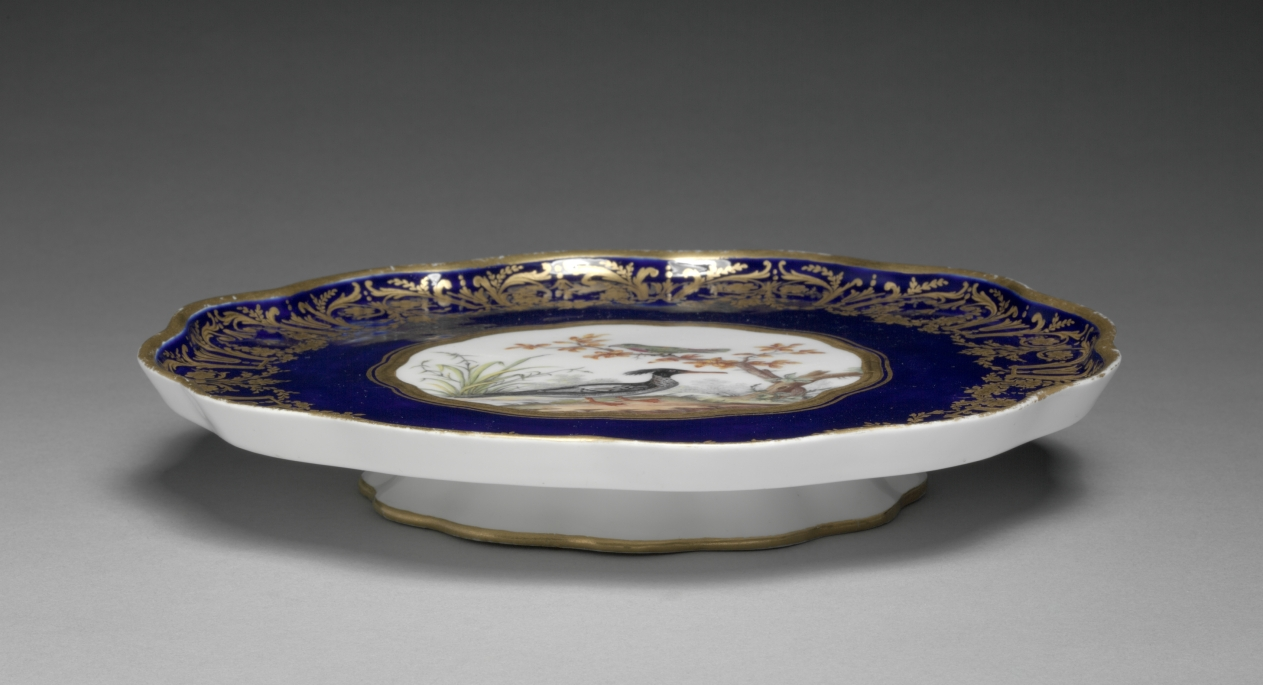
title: Footed Dish (soucoupe à pied)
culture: France, Sèvres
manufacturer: Sèvres Porcelain Factory (French, est. 1756)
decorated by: Etienne Evans (French, 1733–1806)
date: 1786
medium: soft-paste porcelain with enamel and gilt decoration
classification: Ceramic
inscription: [Painted in blue, beneath base]: "Harle hupé, Mâle"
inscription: [Incised twice]: "22"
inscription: [Interlaced Ls with date letter]: "ii"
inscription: Painter's mark of a dagger for Etienne Evans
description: These dishes may have supported cups of sweet ices or pyramidal displays of fruits or sweetmeats as part of a dessert or tea service. On the reverse of the plate the two birds pictured are identified as a Petit Perruche, du Pérou (budgerigar from Peru) and Harle huppé, Mâle (male red-breasted merganser.) Their images were modeled after engravings in naturalist Georges-Louis Leclerc’s Natural History of Birds, a book which regularly inspired Sèvres porcelain paintings in the 1780s and 90s.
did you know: The dark blue ground that rings the edge of this plate is known as beau bleu (beautiful blue) and derived its color from cobalt added to the enamel.